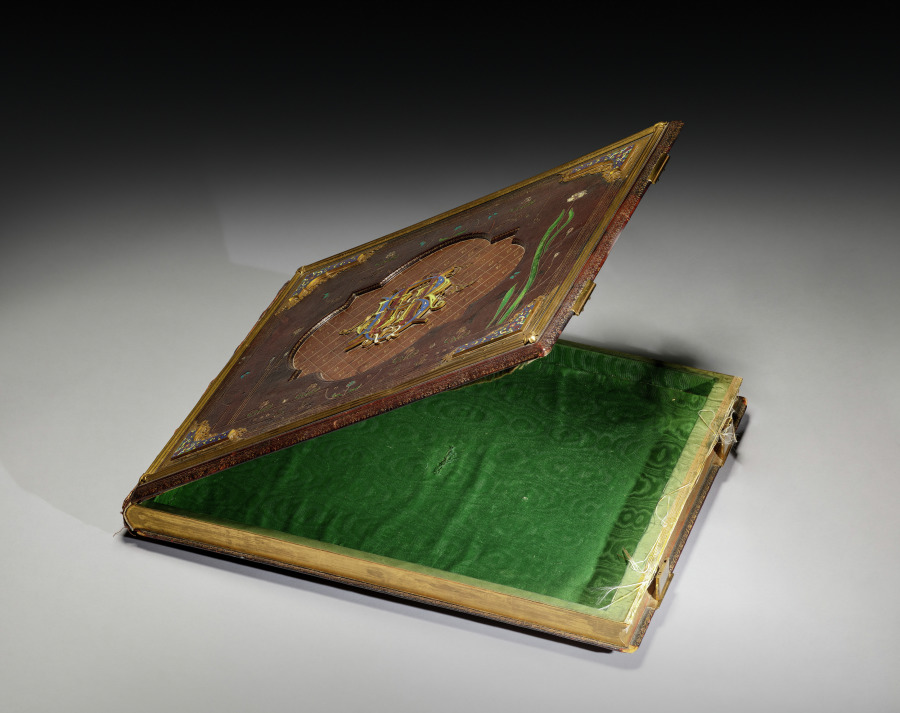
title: Box in the Form of a Book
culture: France(?)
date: c. 1865–80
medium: wooden box covered in leather with gilt metal enameled mounts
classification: Miscellaneous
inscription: central cartouche inset with bronze dore enamel initials, HBJR, N.2 in red, cobalt blue, lime green and white with gilt bronze outline and curliques, inset into medium brown cartouche with a gilt gridwork with each grid filled with a foliate flower, leaves and butterflies in varying sizes.